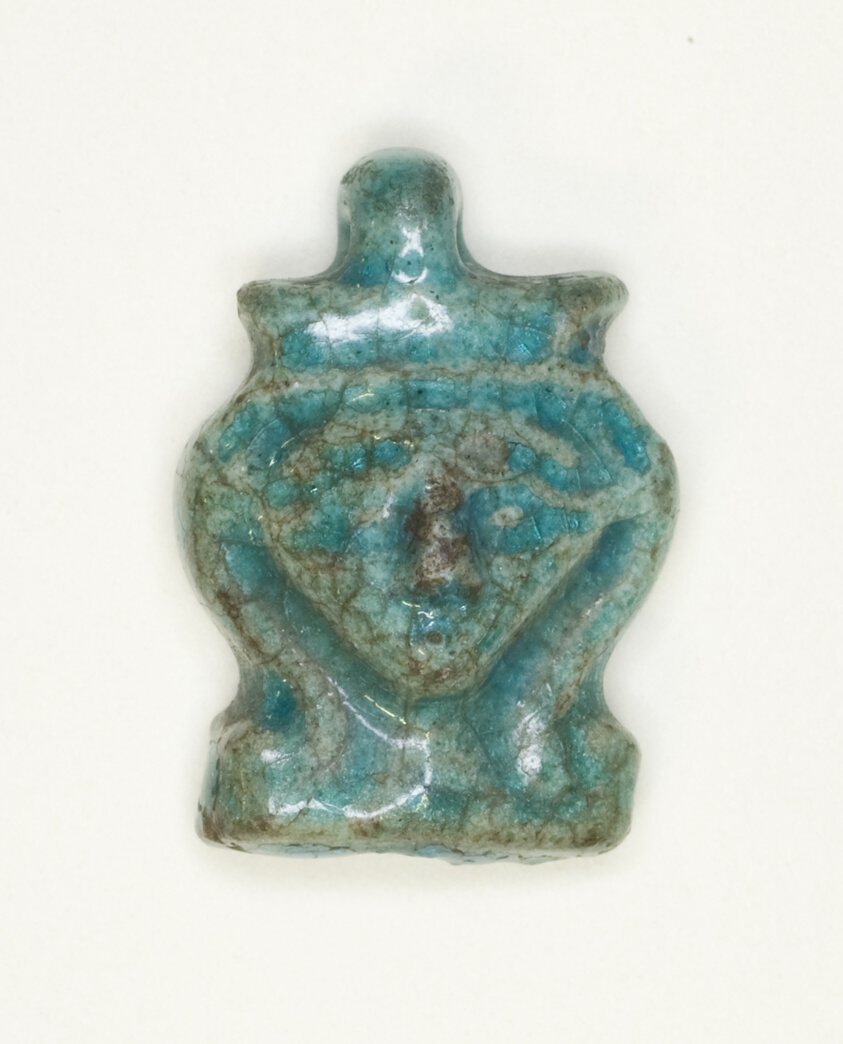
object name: Costume and Accessories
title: Amulet of the Goddess Hathor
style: egyptian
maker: Egyptian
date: New Kingdom, Dynasties 18–20 (about 1550–1069 BCE)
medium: Faience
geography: Egypt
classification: amulet; jewelry; ceramics; ancient art; costume; faïence (composite material)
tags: goddesses